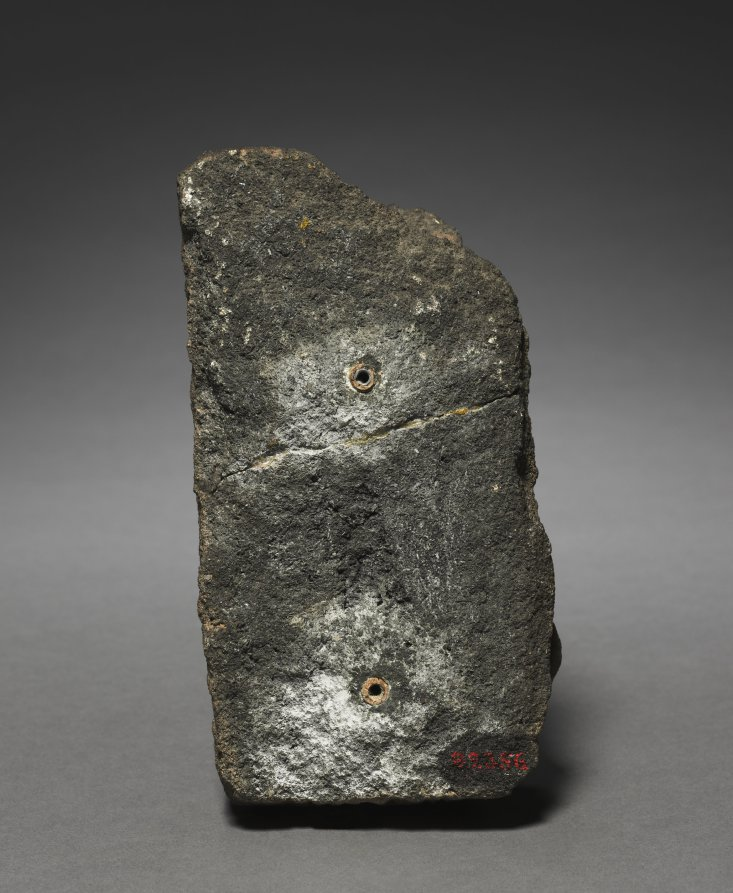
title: Head of a "Bearded Man"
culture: Central Java, Borobudur, c. 9th Century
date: c. 800s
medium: lava stone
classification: Sculpture